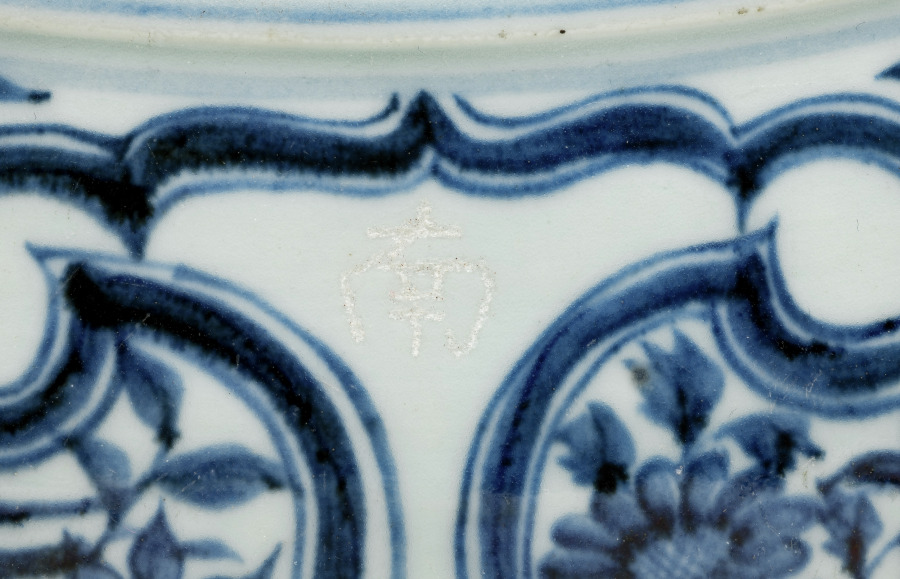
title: Jar with Lion-Head Handles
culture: China, Jiangxi Province, Jingdezhen, Yuan dynasty (1271–1368)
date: 1300s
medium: porcelain with underglaze painted decoration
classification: Ceramic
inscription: 南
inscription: 宮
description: Appreciated for its strong profile, brilliant blue color, and firm delineation of the decorative patterns, this jar is a classic example of Yuan dynasty blue-and-white ware. This type of ware was produced no later than the 1330s for both domestic use (the court and common people alike) and overseas trade. This example testifies to the transmission of artistic ideas and techniques between China and the rest of the great Mongol Empire as a result of trade. The cobalt that was used for the blue underglaze decoration was imported from Iran, likely from Kashan. The band of cloud-collar motifs with phoenixes set against floral grounds, as shown here, is an artistic vocabulary that can also be found in Iranian decorative arts of the Ilkhanid period (1256–1353).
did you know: The characters for "palace" and "south" are scratched into the white glaze on the vessel's shoulder, suggesting that it was once kept in a specific location in a palace.